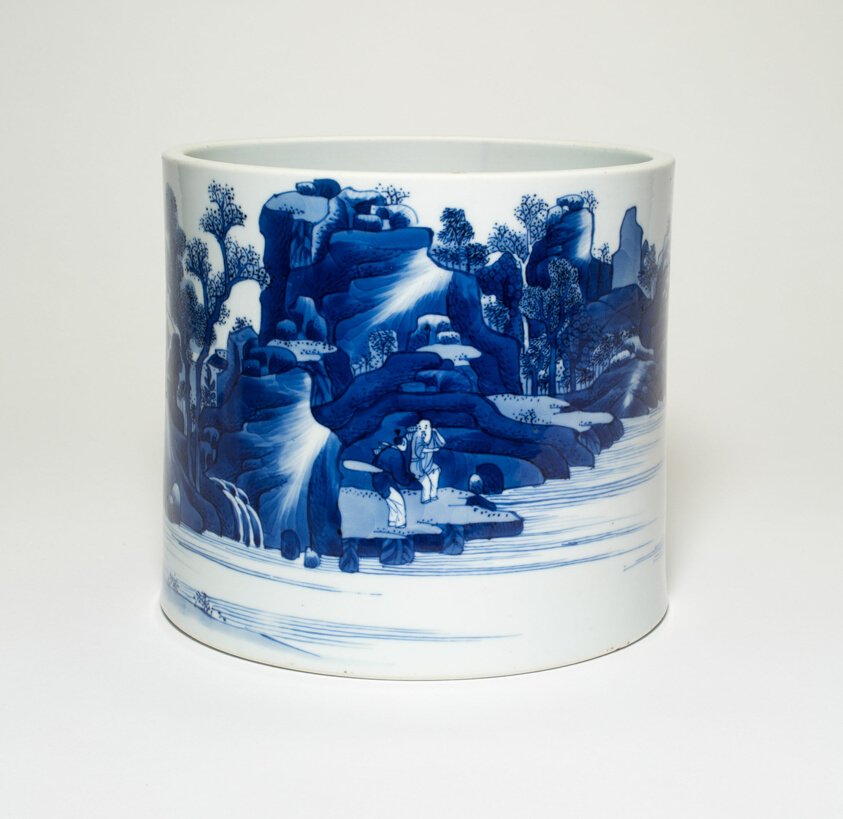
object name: Decorative Arts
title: Cylindrical Jar with Figures in a Landscape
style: Chinese (culture or style)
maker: China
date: Qing dynasty (1644–1911), Kangxi period (1662–1722)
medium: Porcelain painted in underglaze blue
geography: China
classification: porcelain; ceramics; asian art; decorative arts